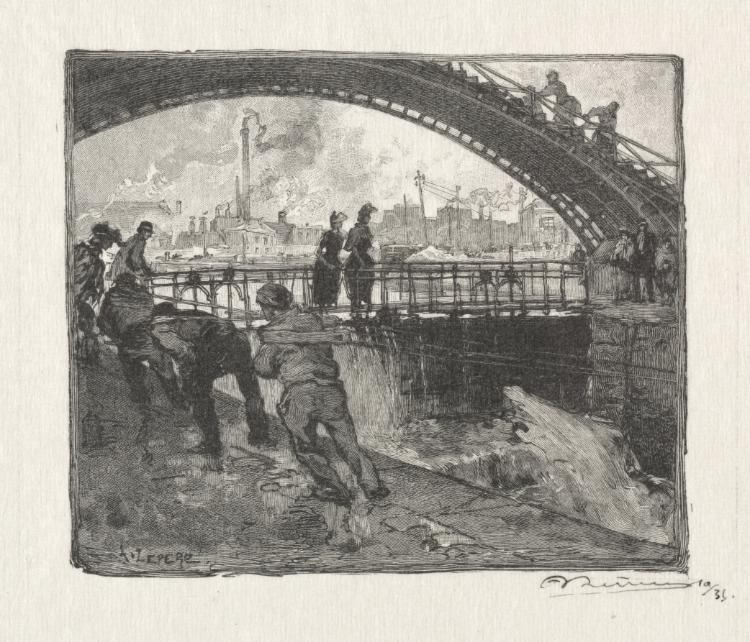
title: L'Ecluse du Canal St. Martin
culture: France, 19th century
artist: Auguste Louis Lepère (French, 1849–1918)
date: 1890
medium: wood engraving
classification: Print